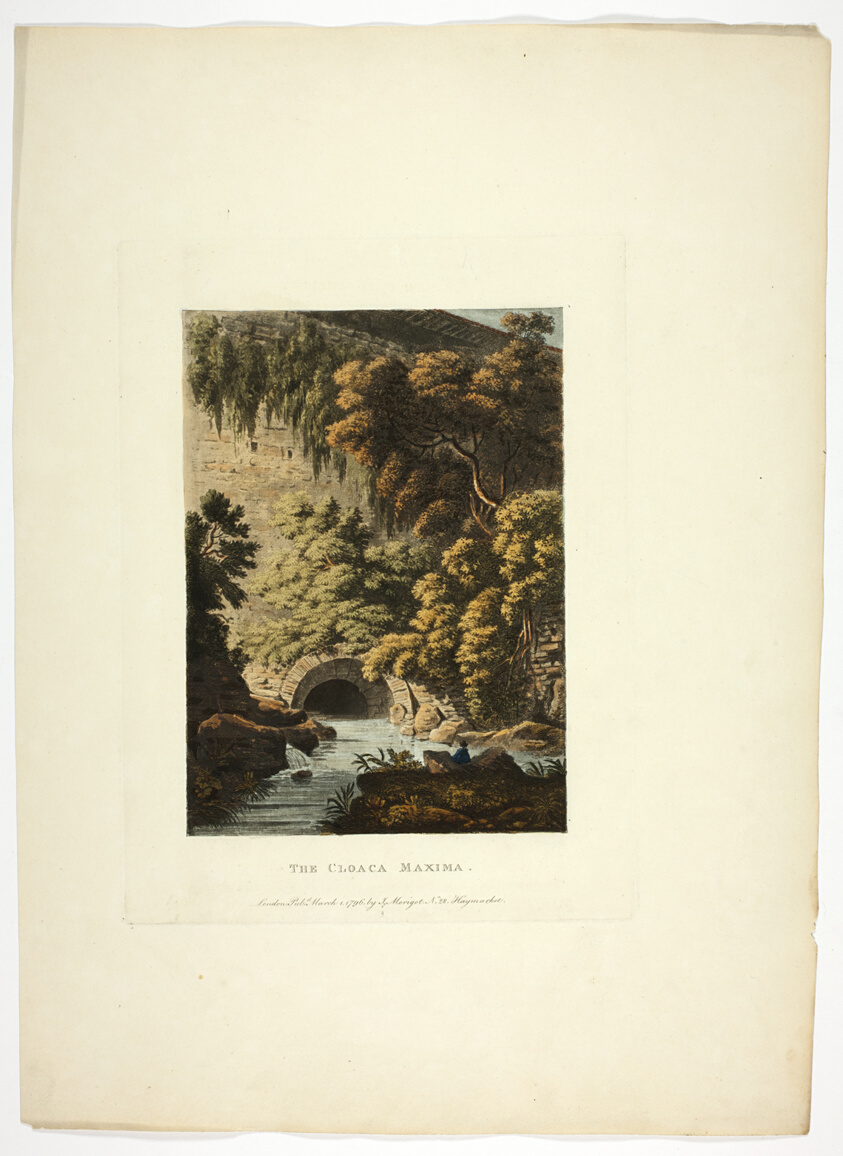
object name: Print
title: The Cloaca Maxima, plate three from Ruins of Rome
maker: M. Dubourg, (English, active 1786-1838); published by J. Merigot (Italian, Unknown)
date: published March 1, 1796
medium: Hand-colored aquatint on paper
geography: England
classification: aquatint; print; prints and drawing